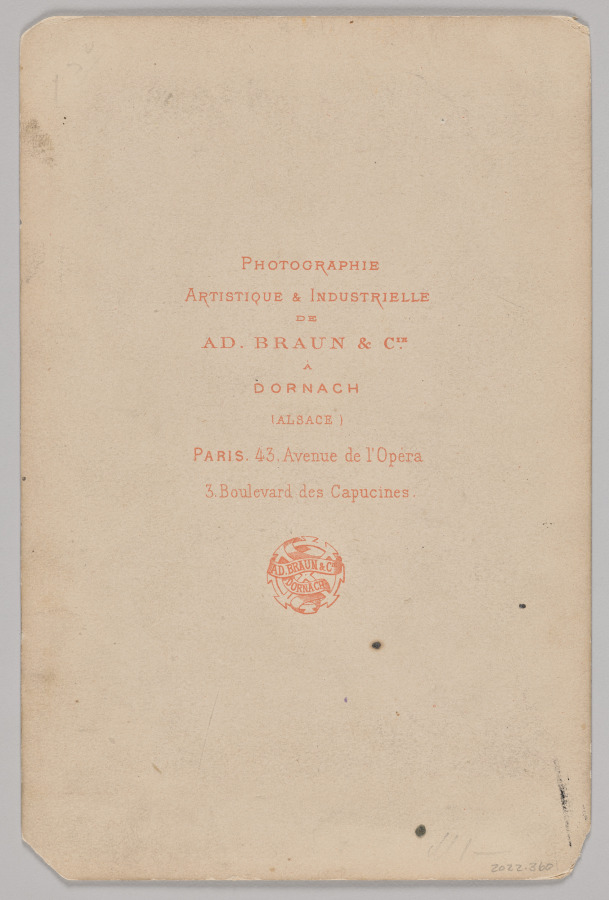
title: Wilhelm I, King of Prussia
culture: Germany, 19th century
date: 1870s–88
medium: albumen print, cabinet card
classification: Photograph